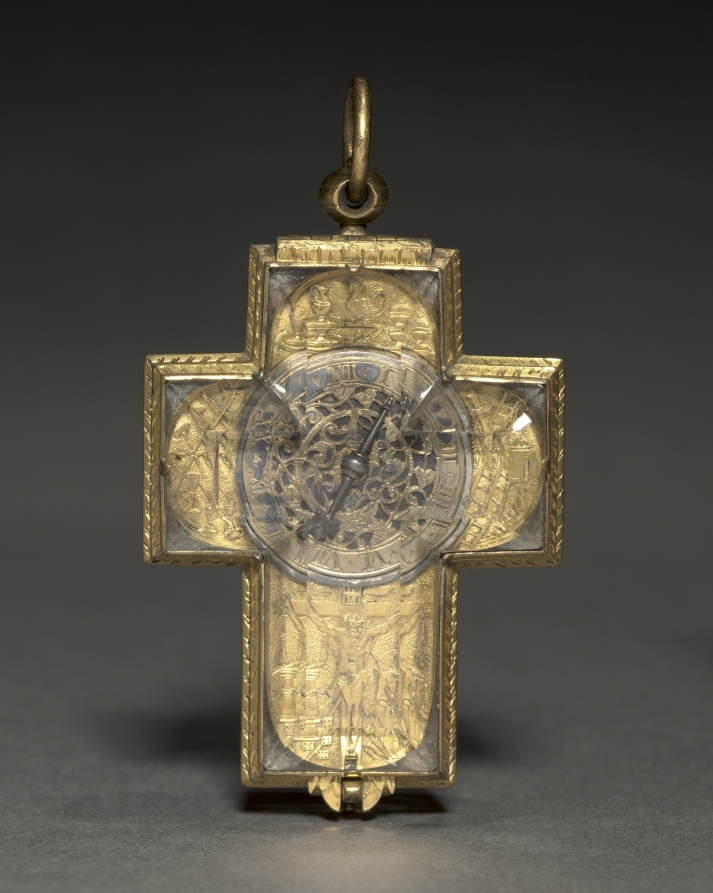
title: Cross-Shaped Clock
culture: Germany, late 16th-early 17th Century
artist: Urban Hörle (German)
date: c. 1600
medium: gilt copper, steel, and rock crystal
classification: Jewelry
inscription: inscribed: Urban Hörle, Mäyntz.